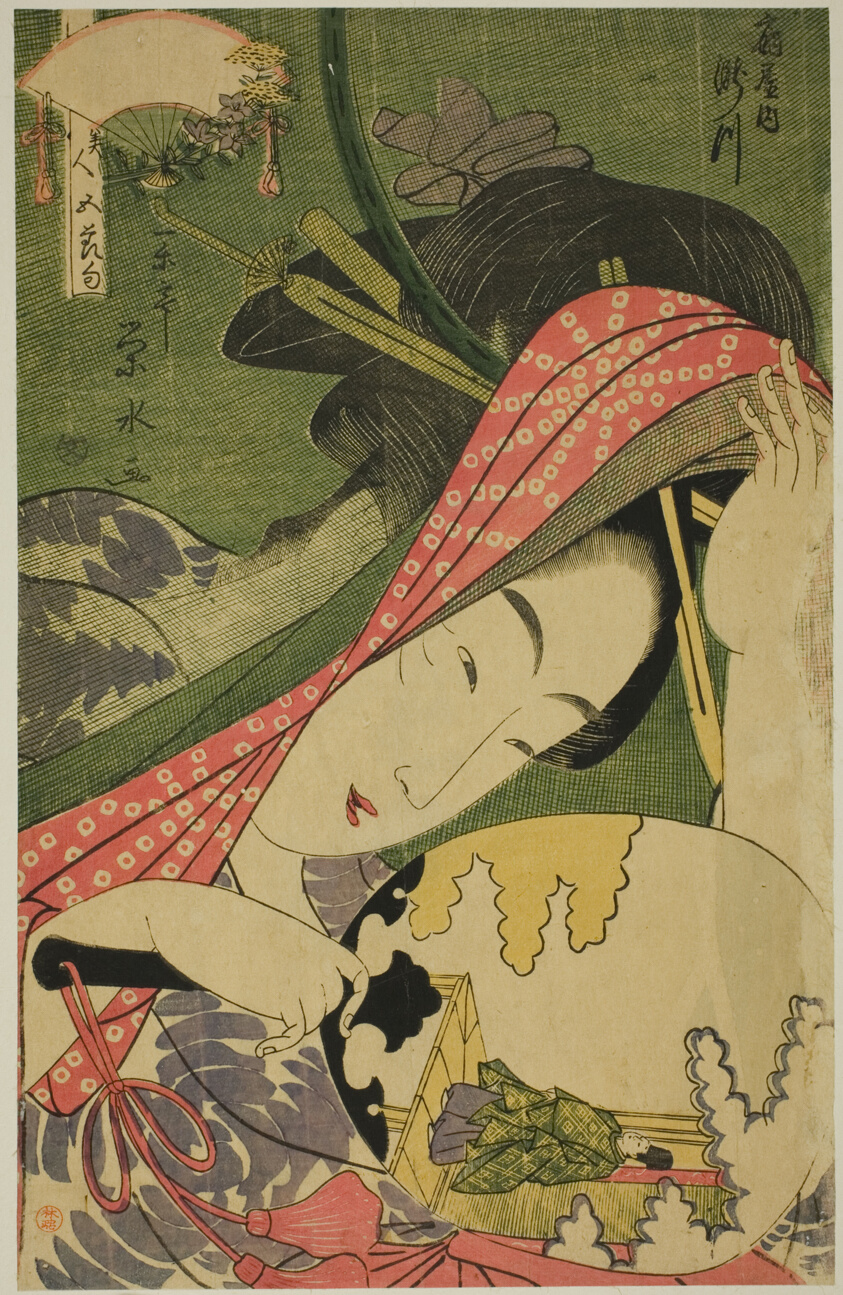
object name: Print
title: The Courtesan Takigawa of the Ogiya, from the series "Beauties of the Five Festivals (Bijin gosekku)"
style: Japanese (culture or style)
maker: Ichirakutei Eisui (Japanese, active 1790-1823)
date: c. 1795/1800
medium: Color woodblock print; oban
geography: Japan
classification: woodblock print; print; asian art